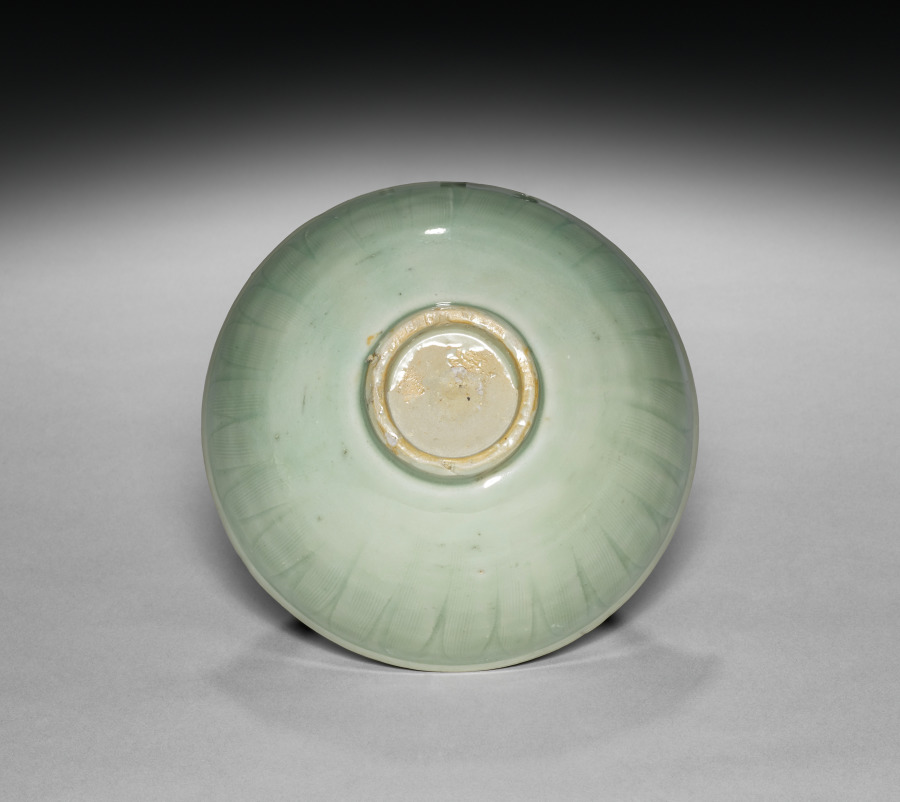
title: Bowl with Carved Lotus Design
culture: China, Southern Song (1127–1279) to Yuan dynasty (1279–1368)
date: 1100s–1300s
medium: Stoneware with pale green (celadon) glaze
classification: Ceramic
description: This pale green–glazed bowl is decorated with a medallion at the center and a lotus motif on the inside and outside walls. China’s increasingly prosperous ceramic industry began exporting green stoneware during the Tang dynasty (618–906) as far as North Africa. Imitations in Korea, Japan, Southeast Asia, and the Middle East are evidence of its popularity and enormous success as export ware.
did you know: In Chinese Buddhist culture, the lotus flower symbolizes good fortune and the process of achieving spiritual enlightenment.